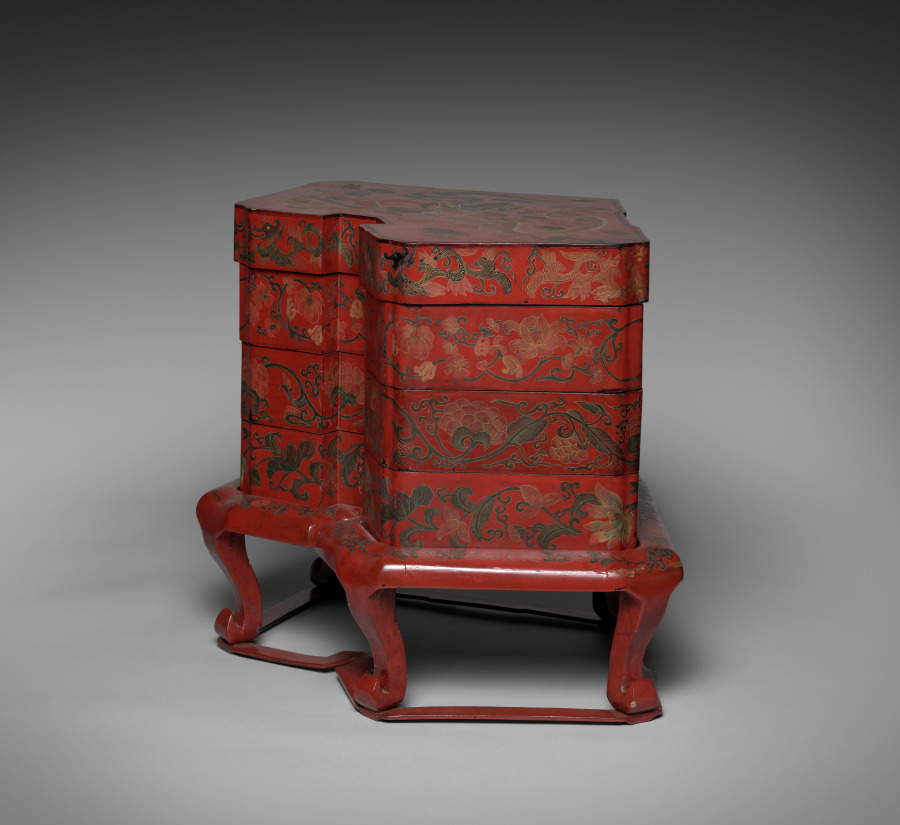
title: Tiered Food Box with Stand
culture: Japan, Edo period (1615–1868)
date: late 1700s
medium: red lacquer over a wood core, with litharge painting and engraved gold designs (Ryukyuan)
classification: Lacquer